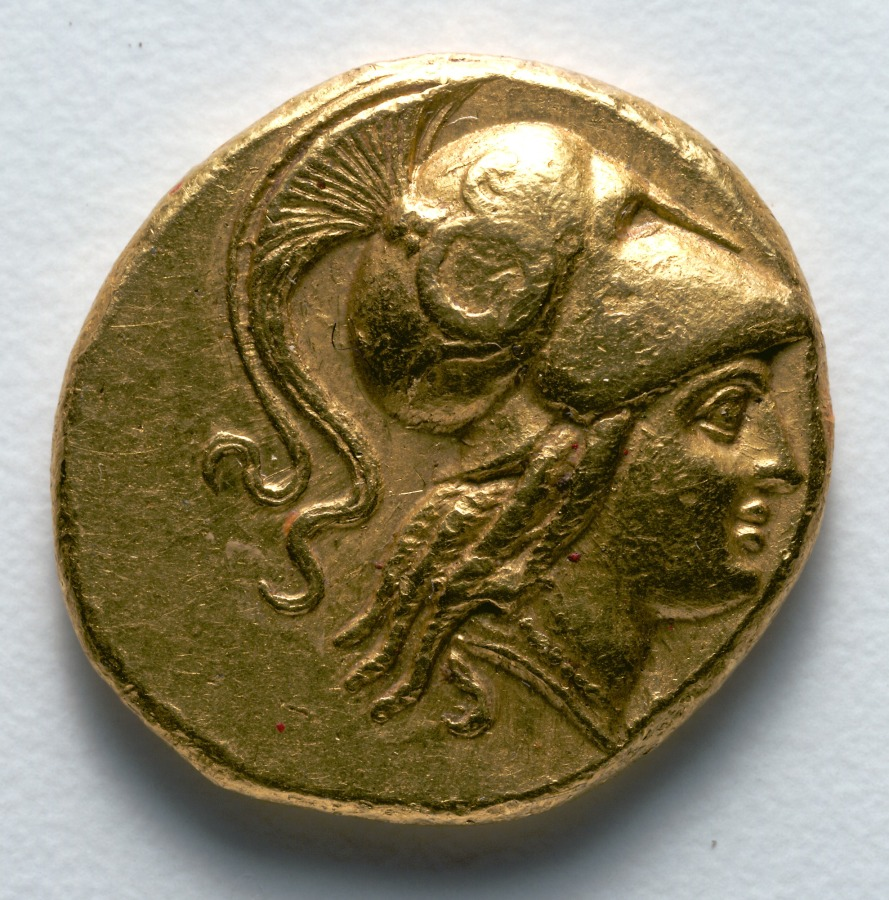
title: Stater: Head of Athena (obverse); Nike (reverse)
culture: Greek, Macedonian, minted at Salamis (Cyprus)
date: c. 325–275 BCE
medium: gold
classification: Coins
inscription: ΑΛΕΞΑΝΔΡΟΥ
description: As the forces of Alexander III [the Great] advanced into Asia, the city-state of Salamis, on the island of Cyprus, voluntarily surrendered itself and its mint. Salamis began producing Macedonian-style coinage, adopting a helmeted Athena on the obverse and a winged Nike offering a laurel wreath on the reverse. The rudder in the left field is the distinguishing symbol of Salamis, a nod to the city’s longstanding maritime prominence.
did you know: Athena appears off-center on this coin’s obverse due to an error in the minting process.